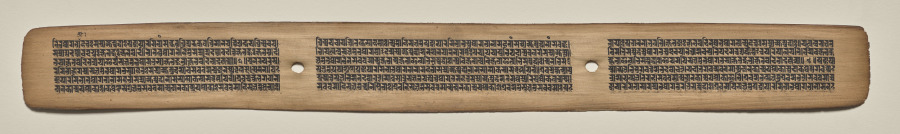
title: Text, Folio 97 (recto), from a Manuscript of the Perfection of Wisdom in Eight Thousand Lines (Ashtasahasrika Prajnaparamita-sutra)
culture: Eastern India, Bihar, Vikramashila Monastery. Painting: Nepal, Kathmandu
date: Sunday, September 14, 1119 (year 239 of the Newar Samvat in the month of Ashvina)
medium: gum tempera and ink on palm leaves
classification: Painting